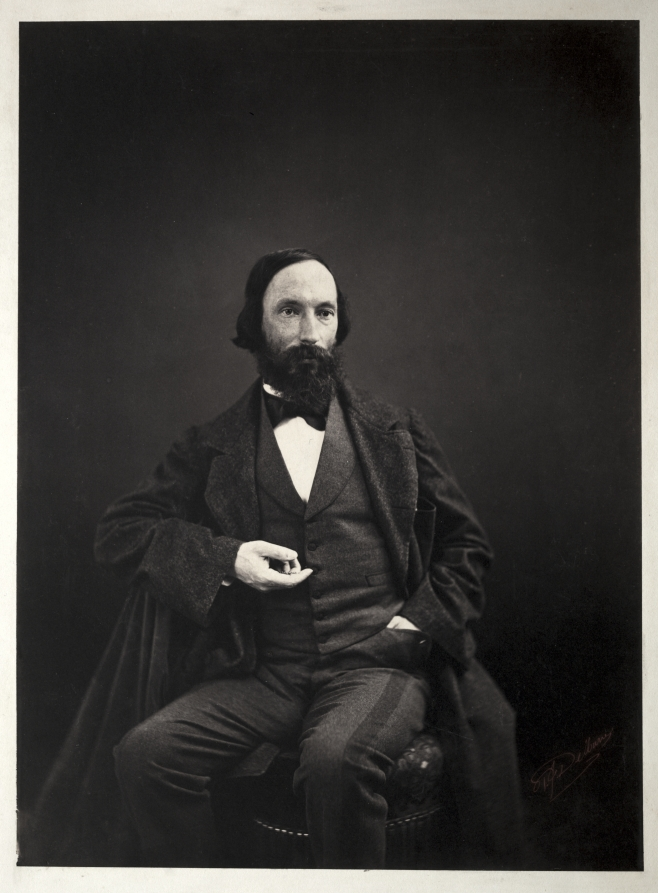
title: Auguste Vacquerie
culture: France, 19th century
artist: Pierre Jean Delbarre (French, 1826-)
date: c. 1860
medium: albumenized salt print from wet collodion negative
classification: Photograph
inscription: written in red ink on recto: "P.J. Delbarre (signed)"